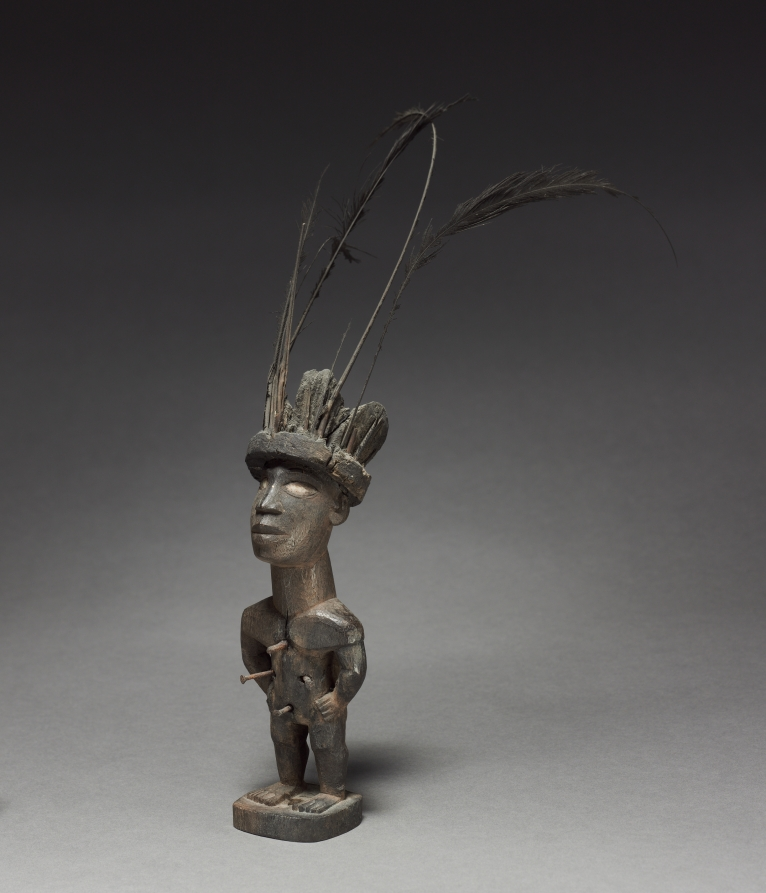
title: Power figure (nkisi)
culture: Africa, Central Africa, Republic of the Congo, Kongo-style maker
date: late 1800s–early 1900s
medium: Wood, feathers, organic material (including resin), iron, and possibly porcelain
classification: Sculpture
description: This figure had lost its nkisi load on the belly, but now shows how the mixture of earth, resin, leaves, glass, and other items was fixed onto the wooden figure, supported by four nails. It had been the property of “the sorcerer of Mboukou.”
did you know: This niksi figurine shows how the mixture of earth, resin, leaves, glass, and other items was fixed. It had been the property of “the sorcerer of Mboukou.”